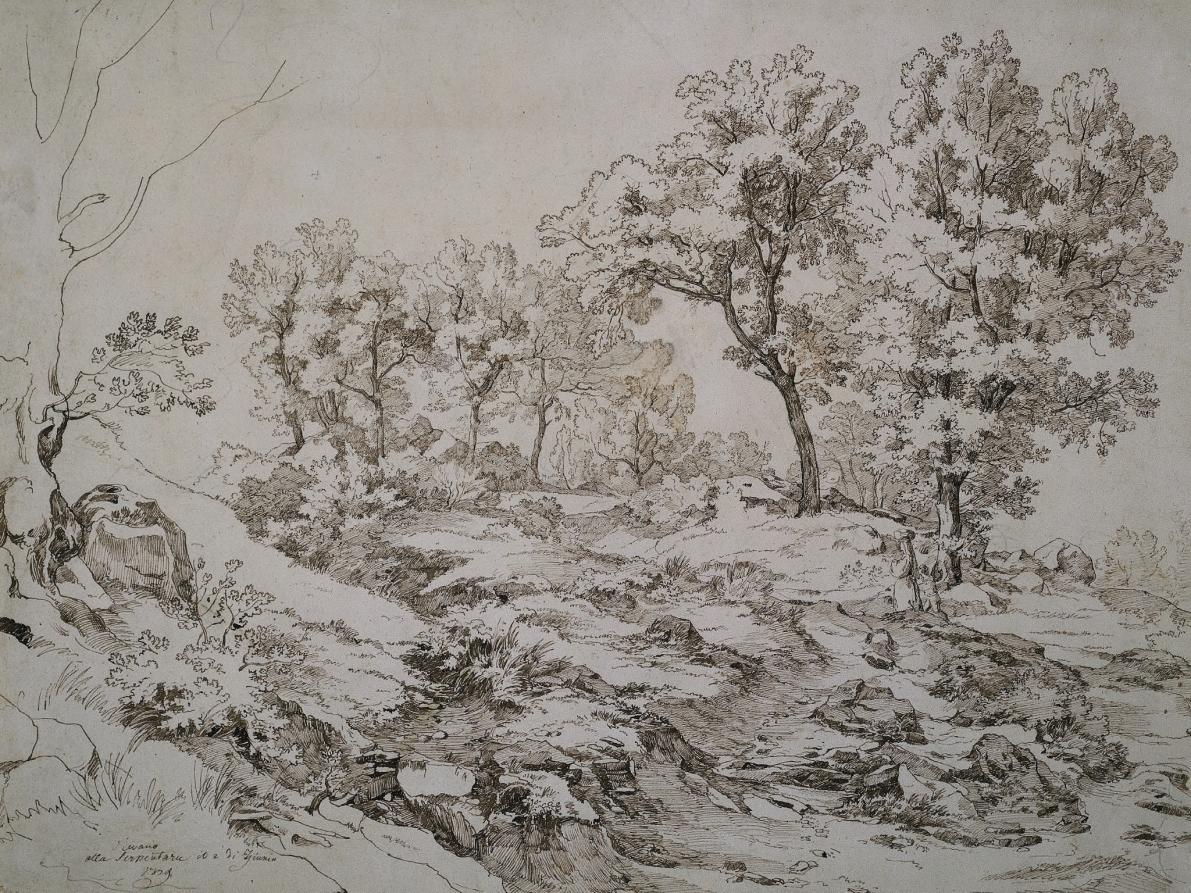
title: La Serpentara near Olevano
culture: Germany, 19th century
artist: Friedrich Preller (German, 1804–1878)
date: 1829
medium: pen and brown ink over black chalk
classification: Drawing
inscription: by artist, lower left, in brown ink: Olevano / alla Serpentara il 2 di Guinio / 1829.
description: Friedrich Preller studied in Weimer, Dresden, and Antwerp before winning a stipend from Grand Duke Karl Alexander von Sachsen-Weimar to study in Rome. During his years in Italy (1828-31), he formed important ideas about landscape painting that would develop into a long career in Germany as a landscape painter. Like his teacher in Italy, the painter Joseph Anton Koch, Preller was inspired by the area known as La Serpentara around the picturesque mountain village of Olevano, southeast of Rome. He made numerous trips there and was especially struck by the oak forest depicted in this drawing. He inscribed the drawing with the locale and date (2 June 1829) in its lower left corner. His lively pen work leaves the lightest areas in outline only, so that the white of the paper helps record the fresh and bright atmosphere of the scene, set in relief by darker areas of firm, parallel hatching. Preller later wrote about the area around Olevano: "Nowhere was the organic coherence in nature so clear as there, and my observation was mainly directed toward that."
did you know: Like many of his German contemporaries in the early 19th century, here Friedrich Preller relied on precise pen lines only without use of brushwork or wash.